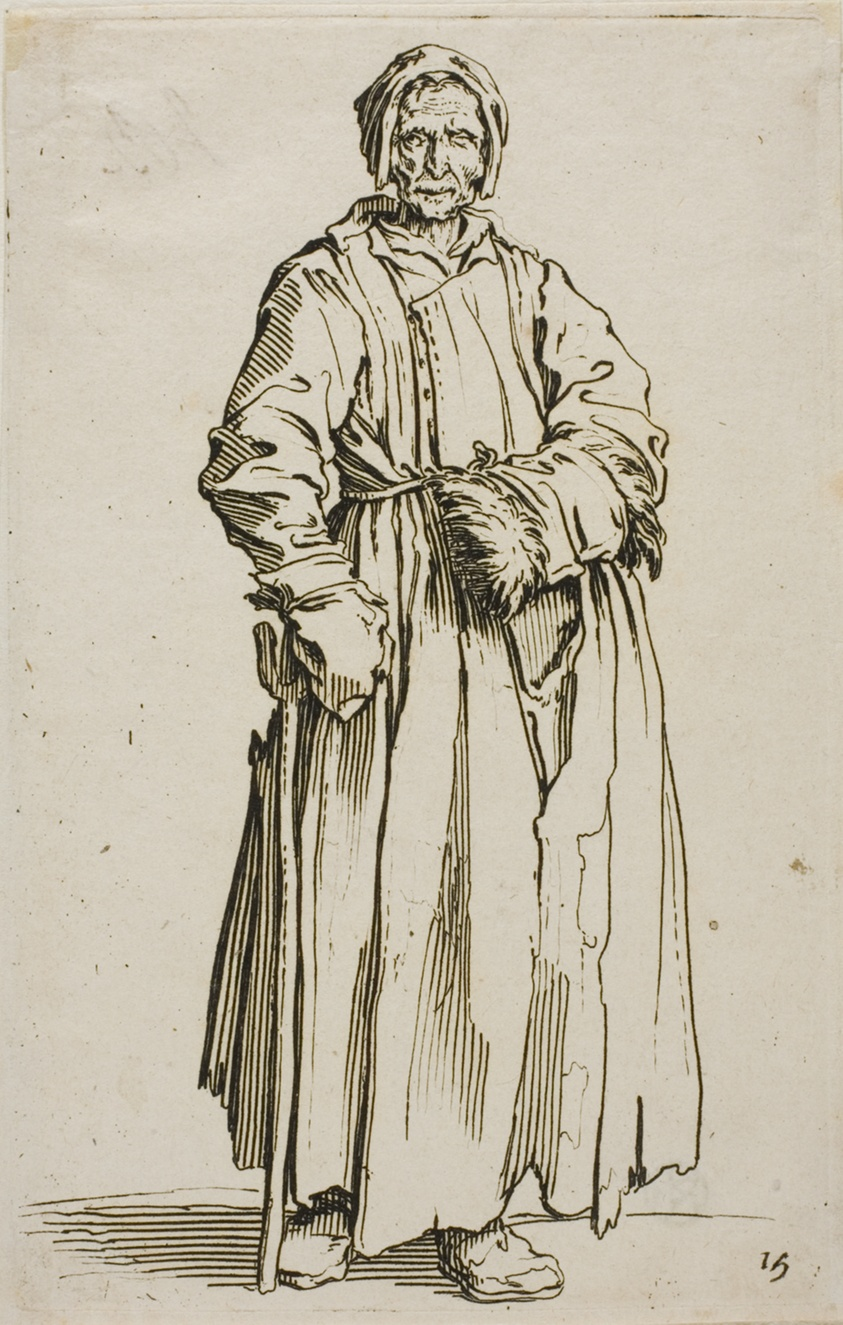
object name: Print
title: The One-Eyed Woman, plate fifteen from The Beggars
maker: Jacques Callot (French, 1592-1635)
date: c. 1622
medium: Etching on paper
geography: France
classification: etching; print; prints and drawing